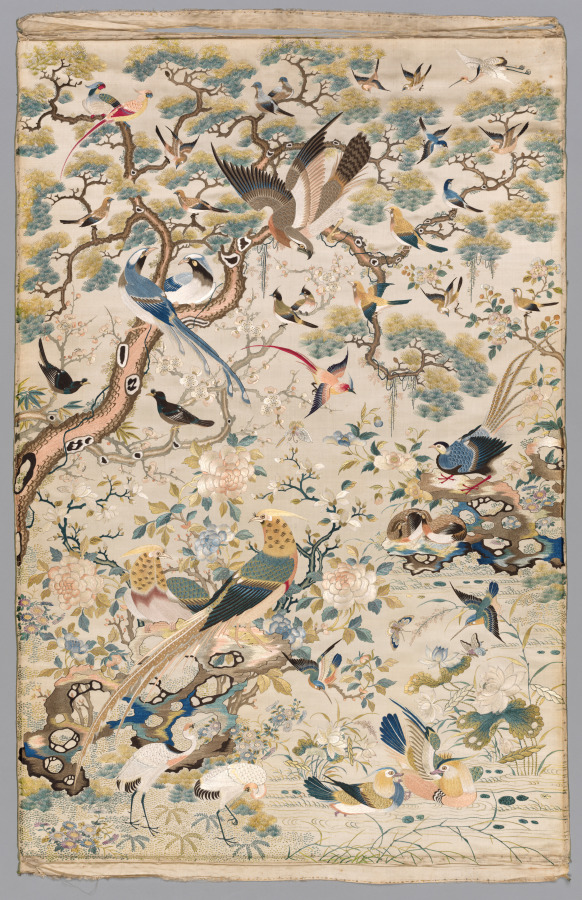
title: A Myriad of Birds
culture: China, Qing dynasty (1644–1911)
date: 1700s–1800s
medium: silk: satin weave with polychrome silk embroidery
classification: Embroidery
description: This embroidered panel, made with extremely fine silk threads, presents a lavishly detailed composition filled with fortuitous imagery. Pairs of birds, including mandarin ducks, peacocks, cranes, swallows, and pheasants, move among flowering trees, ornamental rocks, and aquatic plants, symbolizing harmony, prosperity, and longevity. Cranes stand for longevity, while a pair of mandarin ducks convey wishes for a harmonious marriage. Inspired by the decorative bird-and-flower paintings of the artist Lü Ji, the work prioritizes symbolism over spatial logic. With vibrant colors, meticulous stitching, and fortuitous meaning, the embroidery exemplifies the technical brilliance of Qing dynasty textile art, rivaling the quality of imperial production.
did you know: This magnificent textile, probably executed by a woman, demonstrates the tradition of making embroidered pictures in imitation of paintings.